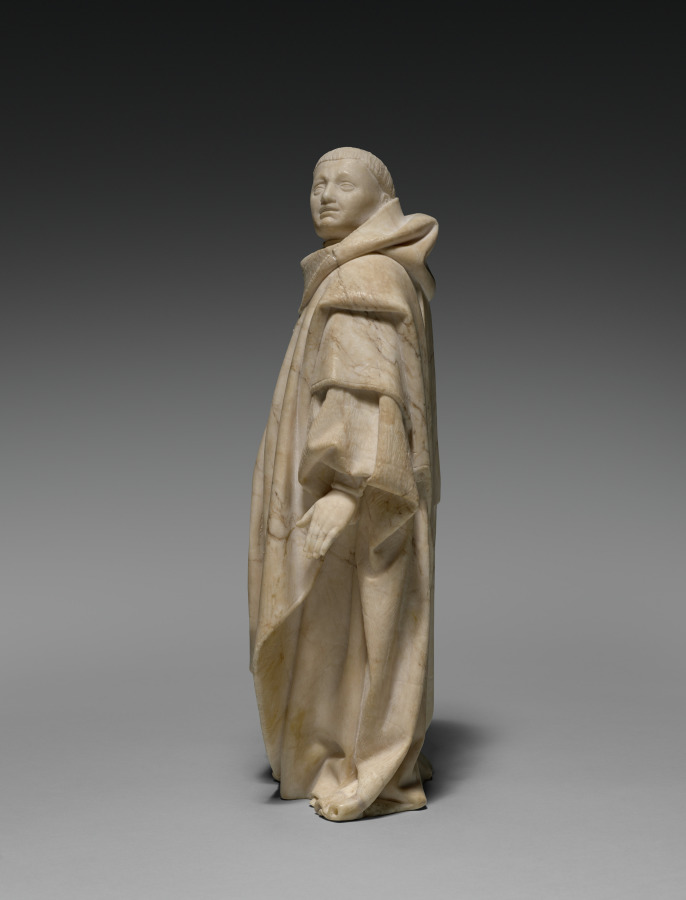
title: Mourner from the Tomb of John the Fearless and Margaret of Bavaria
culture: Spanish, Burgundy, Dijon, 15th century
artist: Jean de la Huerta (Spanish, active Burgundy, 1431–62)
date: 1443–45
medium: salins alabaster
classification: Sculpture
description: This monklike figure has a variously textured monochrome surface. Alabaster’s softness made it easy to carve details like the fabric and fur of the mourner’s robe and the codex pages in his hand. This is one of 40 mourners from an elaborate funeral procession beneath an intricately carved alabaster arcade. This mourner comes from the monastery of Champmol near Dijon, which became a primary burial place for Burgundian dukes. The sculpture was part of the tomb of John the Fearless (1371–1419), commissioned by his son Philip the Good (1396–1467), modeled after the earlier monument for Philip the Bold.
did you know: A plaster cast of this mourner adorns the Tomb of John the Fearless and Margaret of Bavaria in Dijon, France.